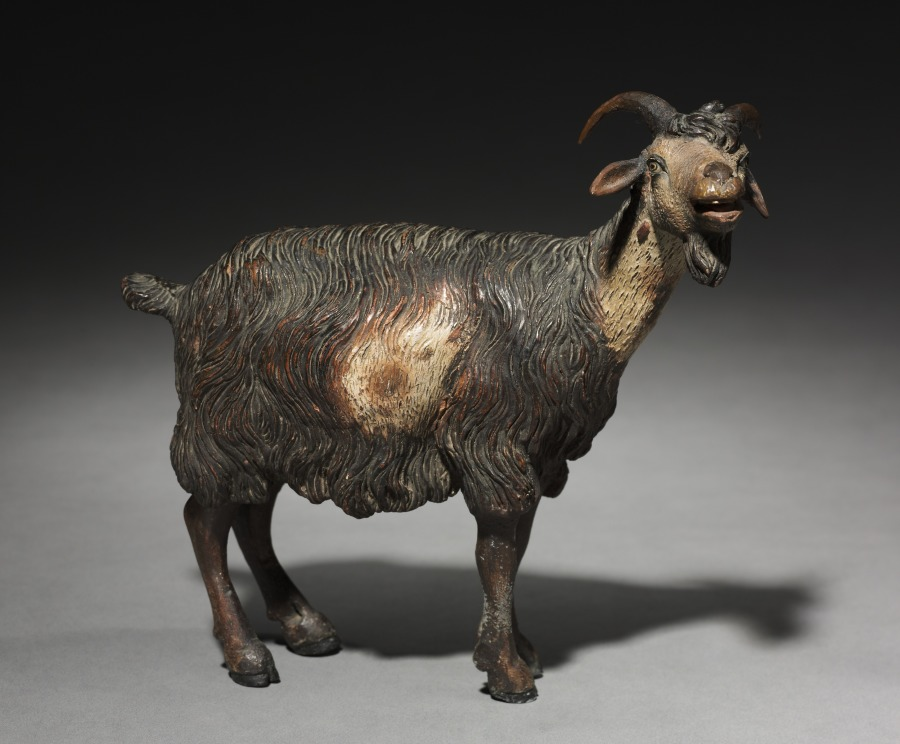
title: Figure from a Crèche: Standing Mountain Goat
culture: Italy, Naples, late 18th-early 19th century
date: 1780–1830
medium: painted wood and terracotta with various textiles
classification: Sculpture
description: The practice of creating scenes of the Nativity for the home dates from the early 1700s in Italy, where people began to set up doll-like figures of about a foot or less in height. The custom was particularly popular in Naples around 1800, where crèche scenes (crèche means cradle, or crib) included many figures, whose heads and hands of painted terracotta, stuffed cloth bodies, and clothing adapted from contemporary local costumes gave them an amazingly realistic character. Representations of the birth of Jesus can be traced to the first few centuries of Christianity. Both living creatures and sculptural depictions of them were used from early times. By the late middle ages it was customary to create life-size figures of wood or stone, naturalistically painted, to represent the characters who participated in the events of Jesus's early life. These sculptures were then arranged in scenes illustrating one or both of the most important of these events, the Adoration of the Shepherds and the Adoration of the Magi-the three kings from the East who came to pay homage to the Christ child. Used in churches, these large figures were especially popular in Italy, Central Europe, Spain, and Portugal. This Object in Focus presentation was organized by Henry Hawley, Curator of Renaissance and Later Decorative Arts and Sculpture.